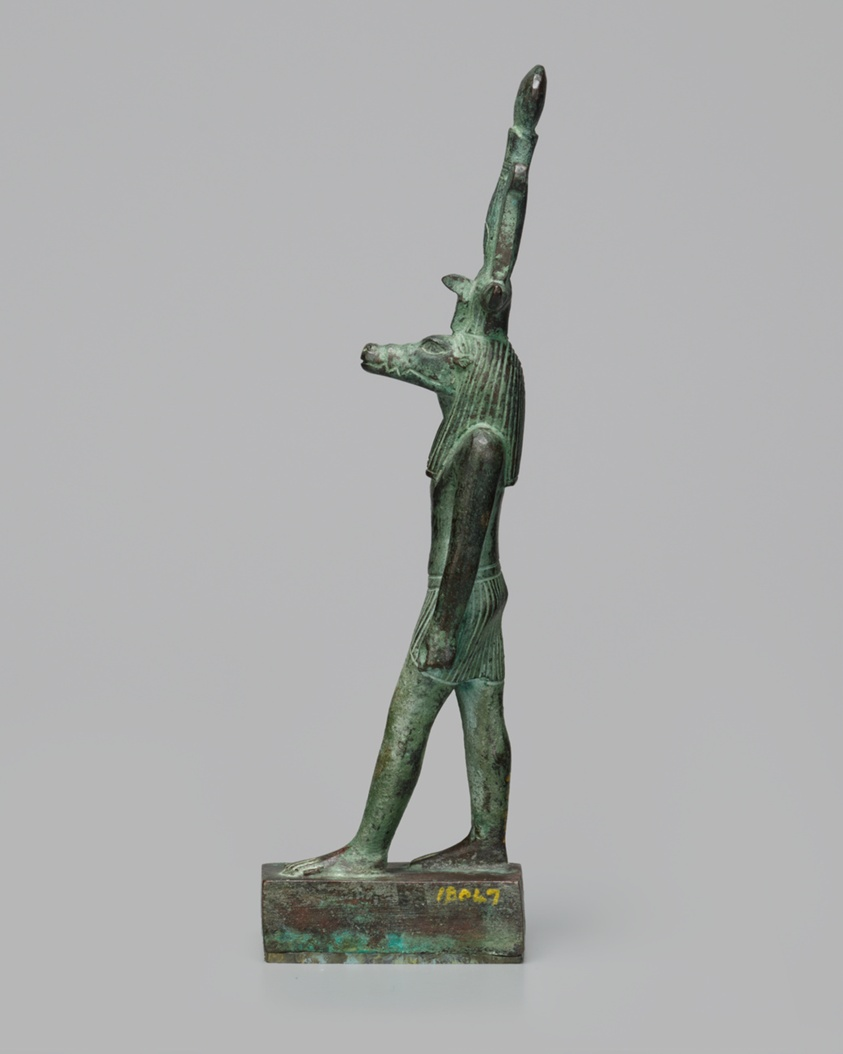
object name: Sculpture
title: Statuette of Sobek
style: late period (egyptian), ancient, egyptian, thirtieth dynasty, twenty-eighth dynasty, twenty-ninth dynasty, twenty-seventh dynasty, twenty-sixth dynasty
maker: Egyptian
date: Late Period, Dynasty 26–30, 664–332 BCE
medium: Copper alloy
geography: Egypt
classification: statuette; bronze; metal; sculpture; ancient art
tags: gods (deities), crowns, crocodiles